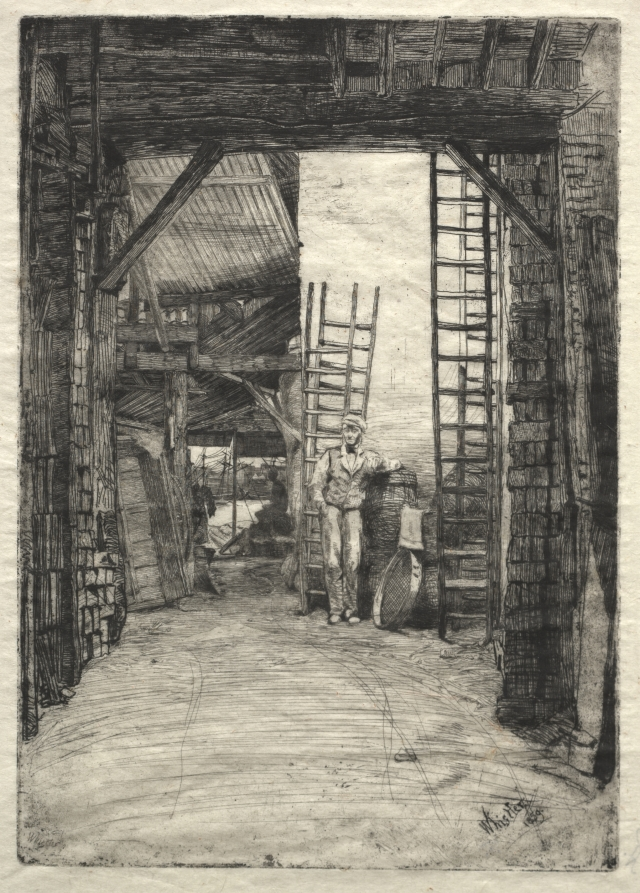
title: The Lime-Burner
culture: America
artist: James McNeill Whistler (American, 1834–1903)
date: 1859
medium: etching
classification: Print